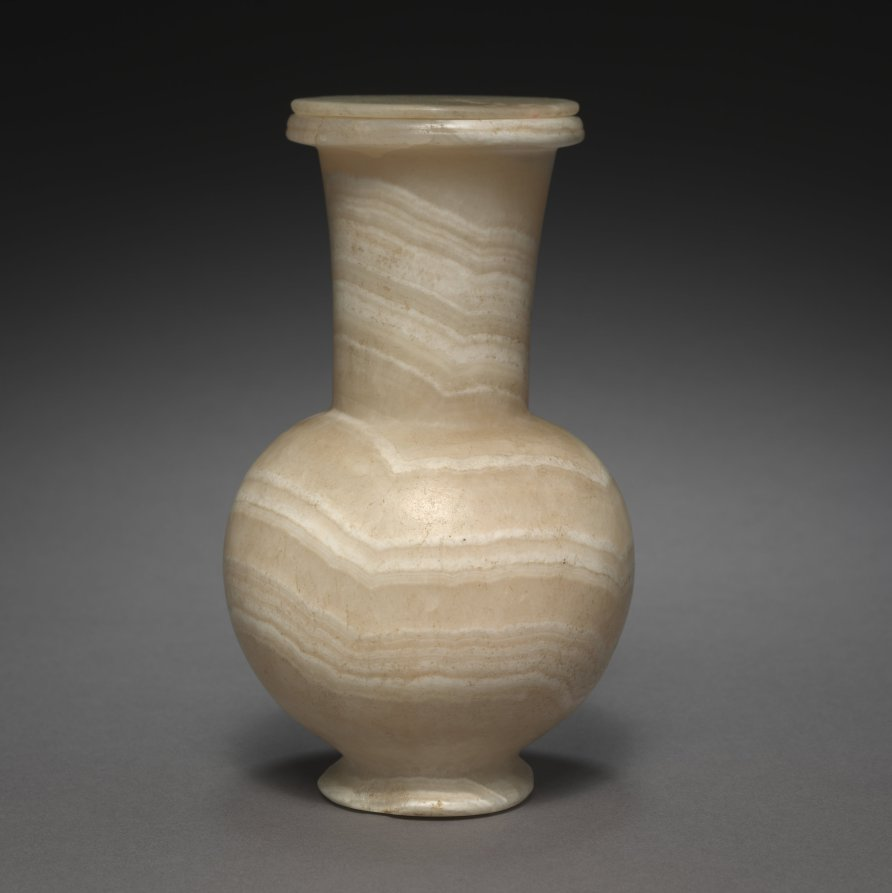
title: Long-Necked Flask with Lid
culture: Egypt, New Kingdom (1540–1069 BCE), Dynasty 18, reign of Tuthmosis III (1479–1425 BCE)–reign of Amenhotep III (1390–1352 BCE)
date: 1401–1353 BCE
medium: travertine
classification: Vessels